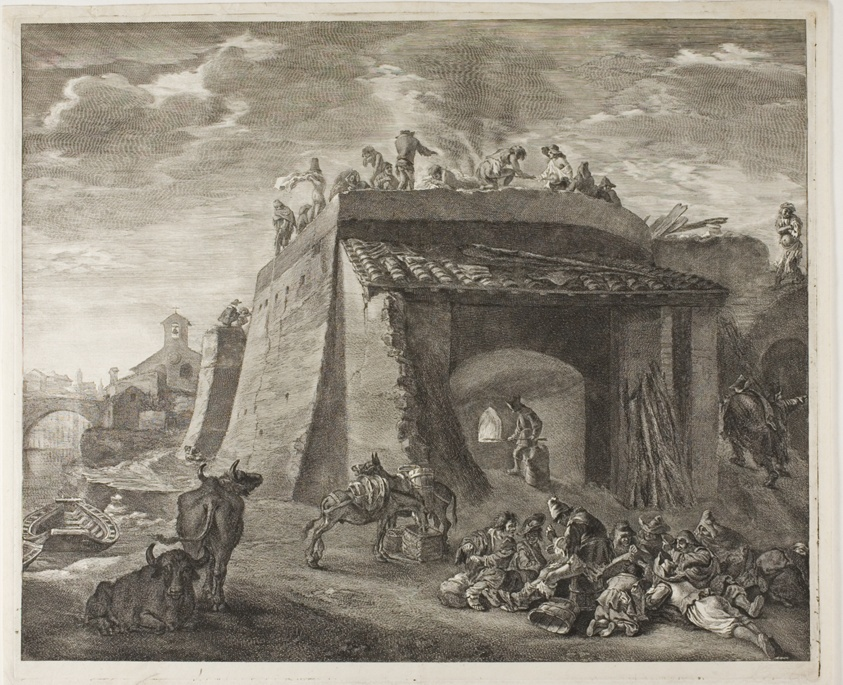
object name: Print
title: The Large Lime-Kiln, from Cabinet Reynst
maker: Cornelis Visscher (Dutch, c. 1629-1658); after Pieter van Laer (Netherlandish, 1592-1642)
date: 1655–58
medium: Engraving and etching in black on ivory laid paper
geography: Holland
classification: engraving; print; prints and drawing